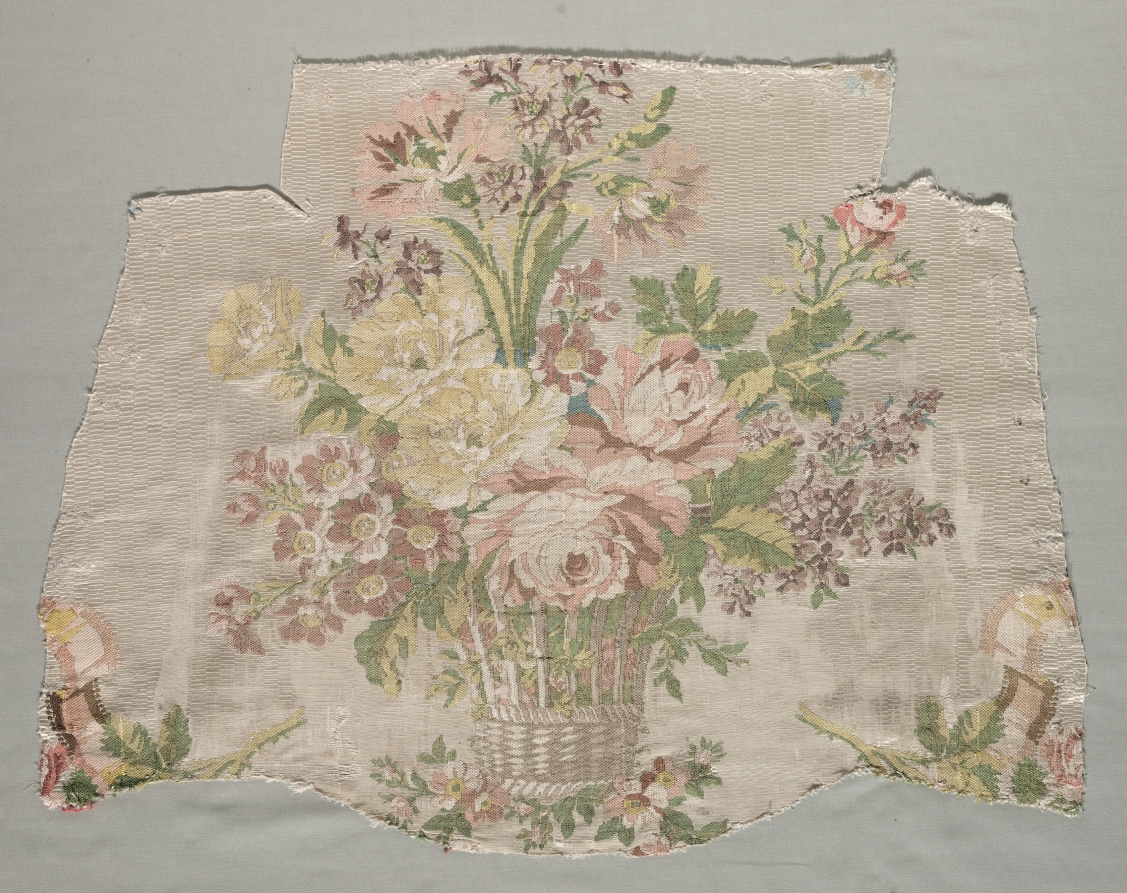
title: Silk Fragment, Part of Panel called "Le panier fleuri"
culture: France, 18th century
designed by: Philippe de Lasalle (French, 1723–1805)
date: 1770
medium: brocade, silk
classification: Textile